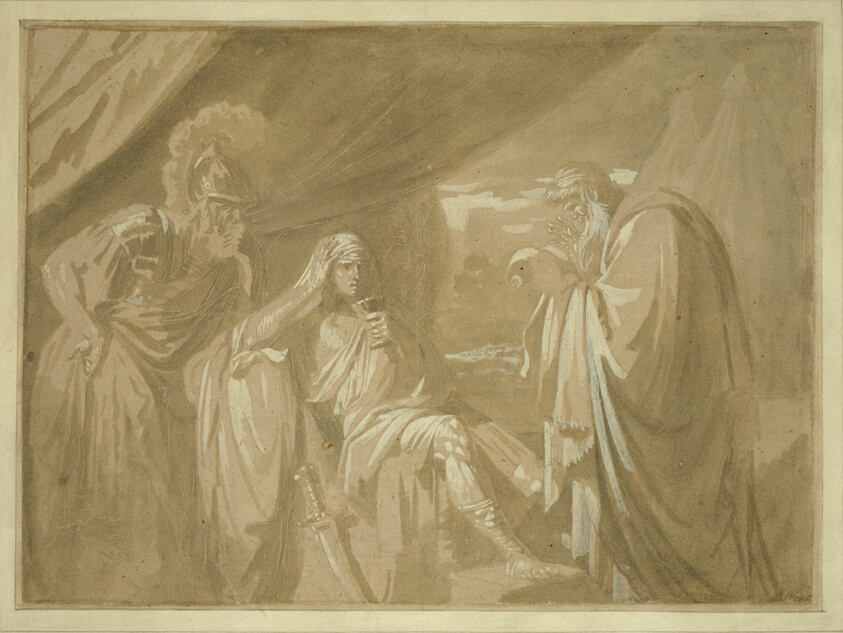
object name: Drawing and Watercolor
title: Alexander's Confidence with his Physician Philip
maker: Benjamin West (American, 1738-1820)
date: c. 1770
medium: Brush and brown and black wash, with tan gouache, heightened with white gouache, with incising, on ivory laid paper, laid down on ivory laid card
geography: United States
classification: wash; drawings (visual works); prints and drawing